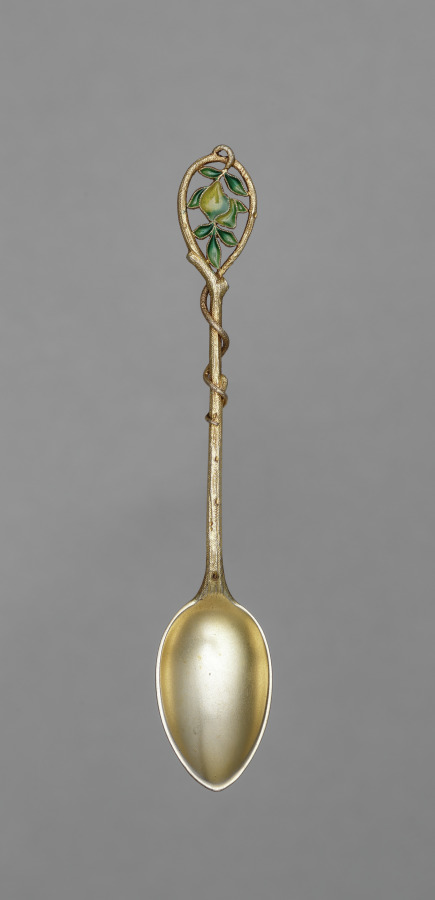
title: Spoon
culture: Austria, Vienna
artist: firm of Georg Adam Scheid (Austrian)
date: c. 1870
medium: silver gilt with plique-a-jour enamel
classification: Silver